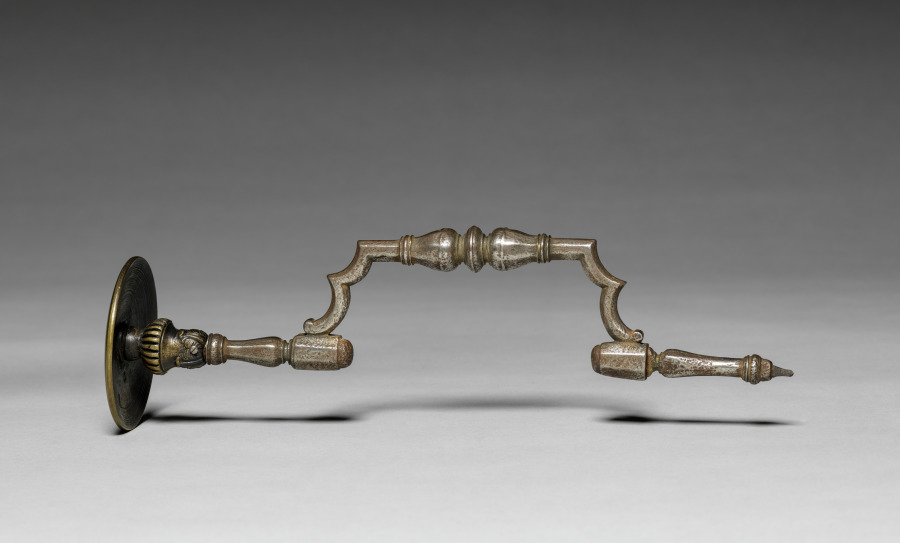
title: Hand Drill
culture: Europe, 17th century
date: 1600s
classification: Tool